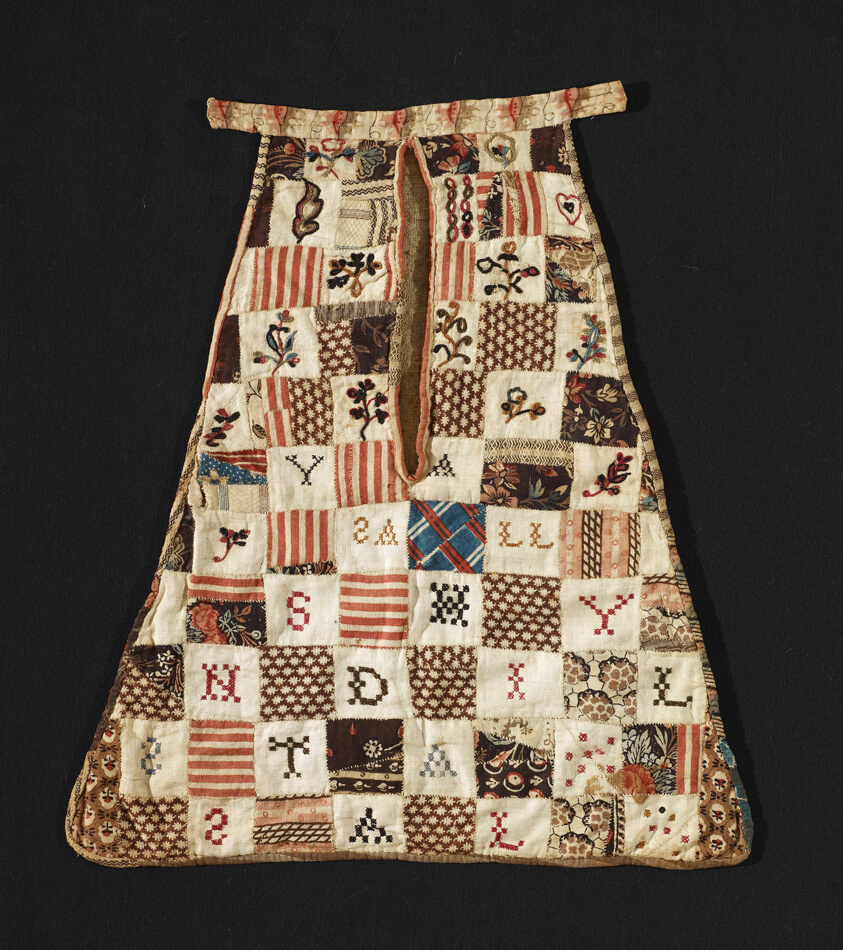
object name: Costume and Accessories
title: Pocket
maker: Attributed to Sally Standish (American, c. 1799); United States, Massachusetts or Rhode Island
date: c. 1799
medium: Cotton, plain weaves; some embroidered with silk in chain and cross stitches; some printed; pieced; edged with cotton, plain weaves; some printed; lined with linen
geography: United States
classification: textile; needlework (visual works); costume; dress (garment); clothing